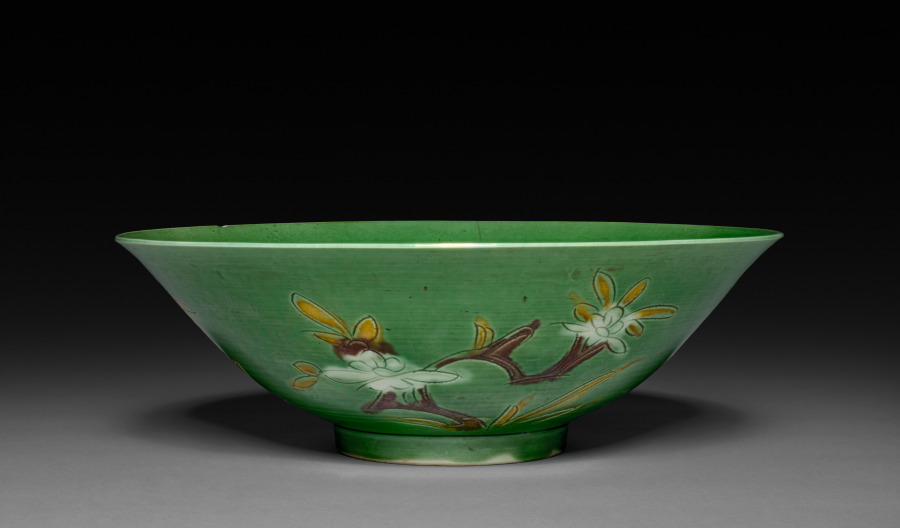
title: Bowl with Sprays of Flowers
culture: China, Jiangxi province, Jingdezhen kilns, Qing dynasty (1644-1911), Kangxi reign (1662-1722)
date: 1662–1722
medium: porcelain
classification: Ceramic